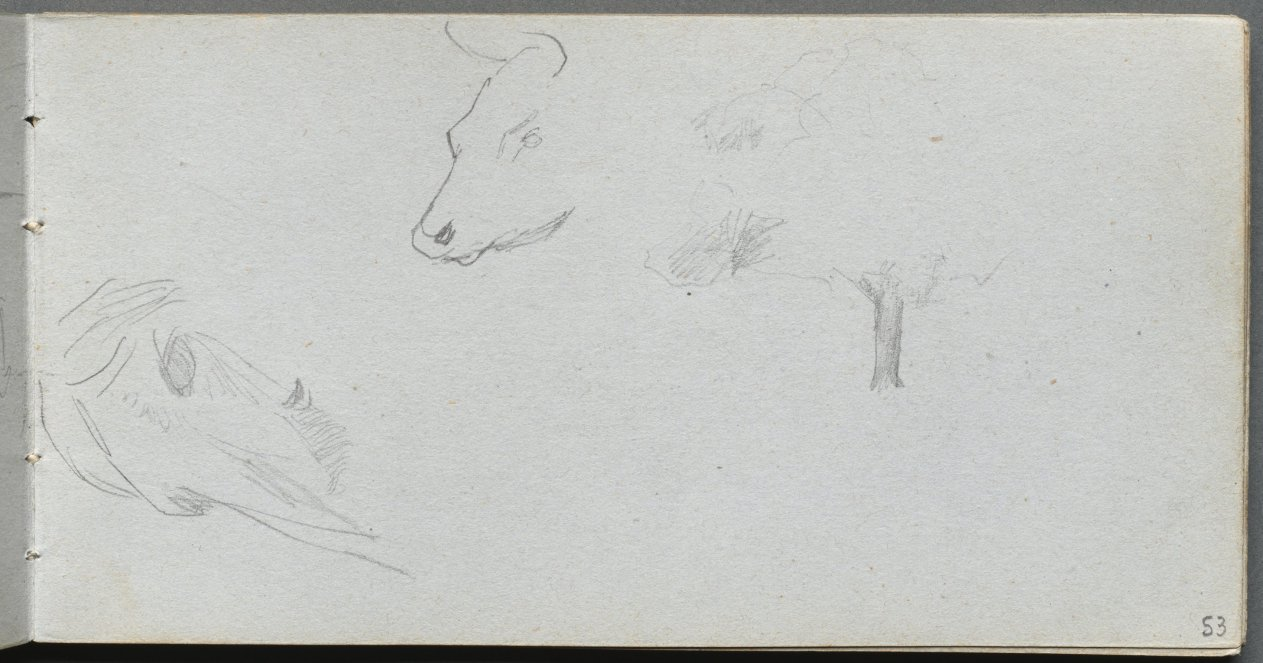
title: Sketchbook, page 53: Animal Studies and Tree Study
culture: France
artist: Ernest Meissonier (French, 1815–1891)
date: c. 1860s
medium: graphite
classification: Bound Volume